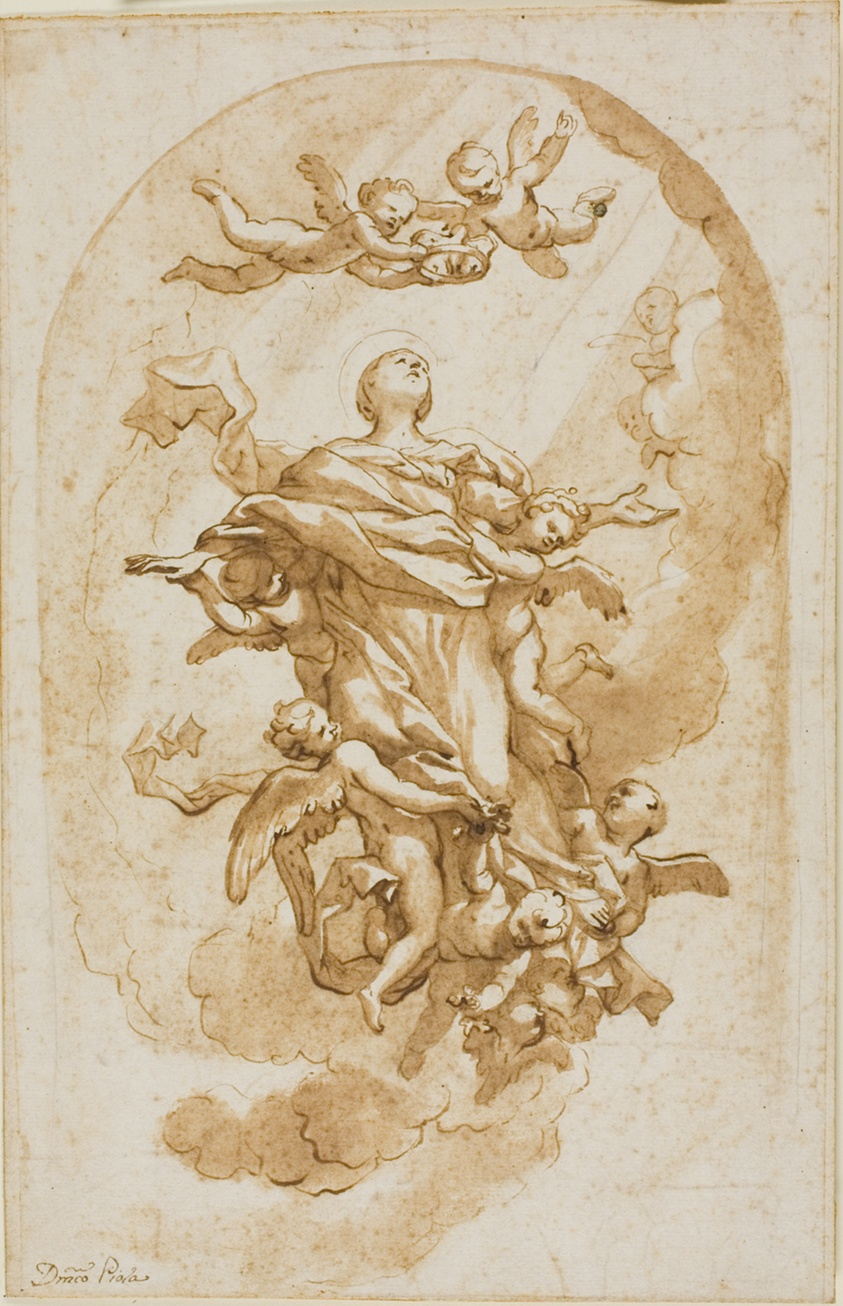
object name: Drawing and Watercolor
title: Assumption of the Virgin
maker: Domenico Piola (Italian, 1627-1703)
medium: Pen and brown ink, with brush and brown wash, over black chalk on ivory laid paper, laid down on cream wove board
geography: Italy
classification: ink or chalk wash; drawings (visual works); prints and drawing